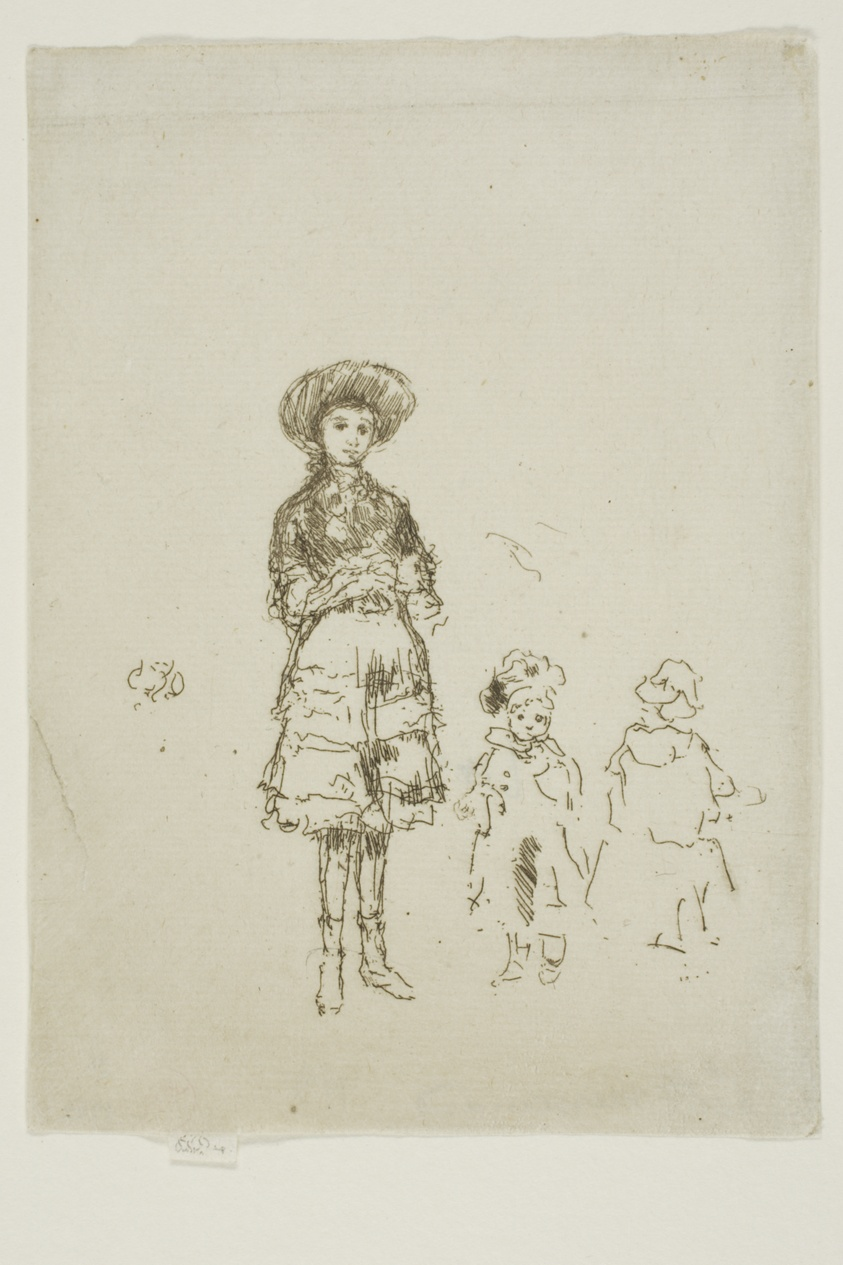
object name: Print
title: The Little Nurse, Grays Inn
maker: James McNeill Whistler (American, 1834-1903)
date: 1887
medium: Etching with foul biting in black ink on ivory laid paper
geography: United States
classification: etching; foul biting; print; prints and drawing; paper